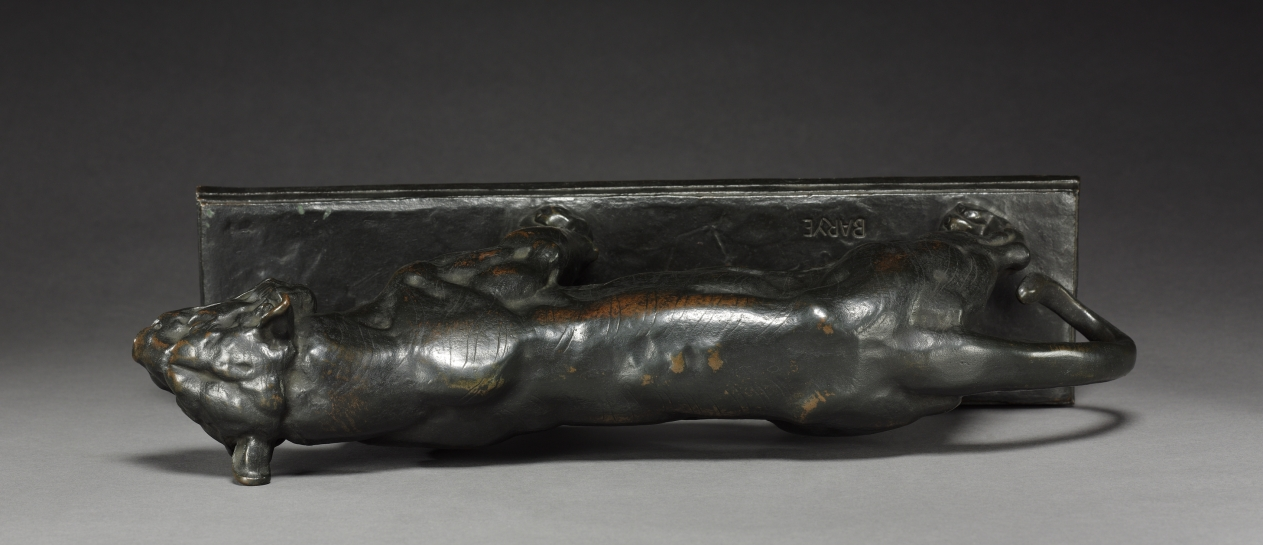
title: Walking Tiger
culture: France, 19th century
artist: Antoine-Louis Barye (French, 1796–1875)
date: c. 1836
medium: bronze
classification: Sculpture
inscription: Signed on base: "Barye"